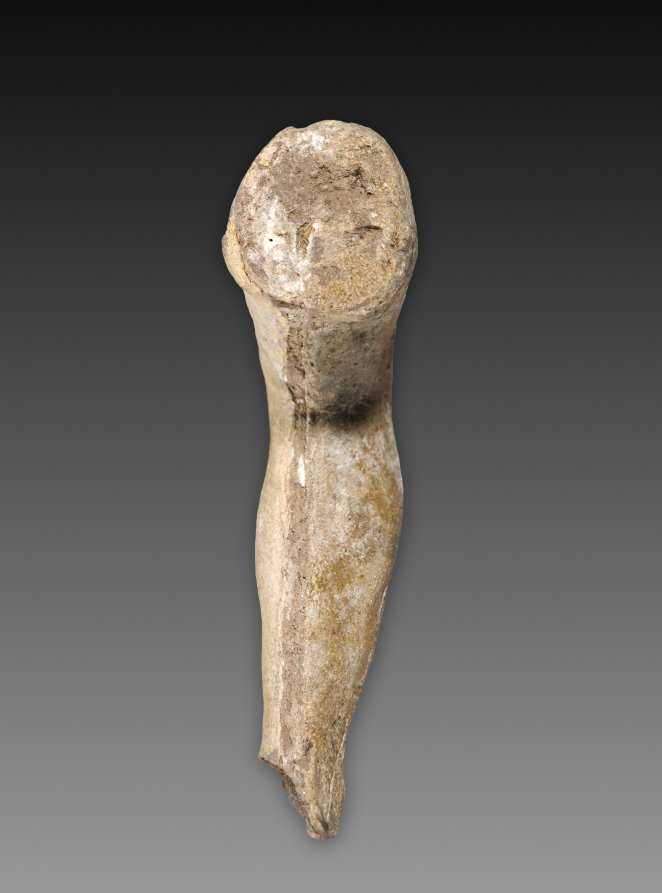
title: Fragment of a Leg (right leg)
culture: France, late 19th-early 20th Century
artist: Auguste Rodin (French, 1840–1917)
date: c. 1880 – 1917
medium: plaster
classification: Sculpture